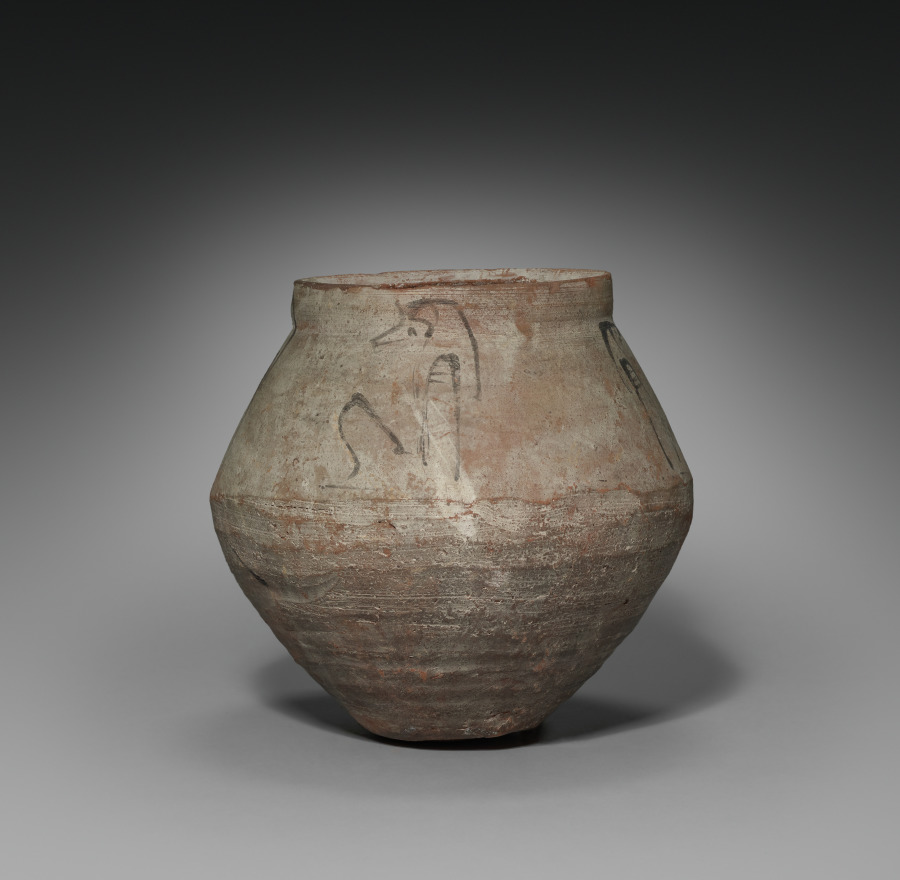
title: Shawabty Jar with Lid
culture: Egypt, New Kingdom (1540–1069 BCE), Dynasties 19–20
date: 1295–1069 BCE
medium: Nile silt ware; lid of limestone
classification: Funerary Equipment